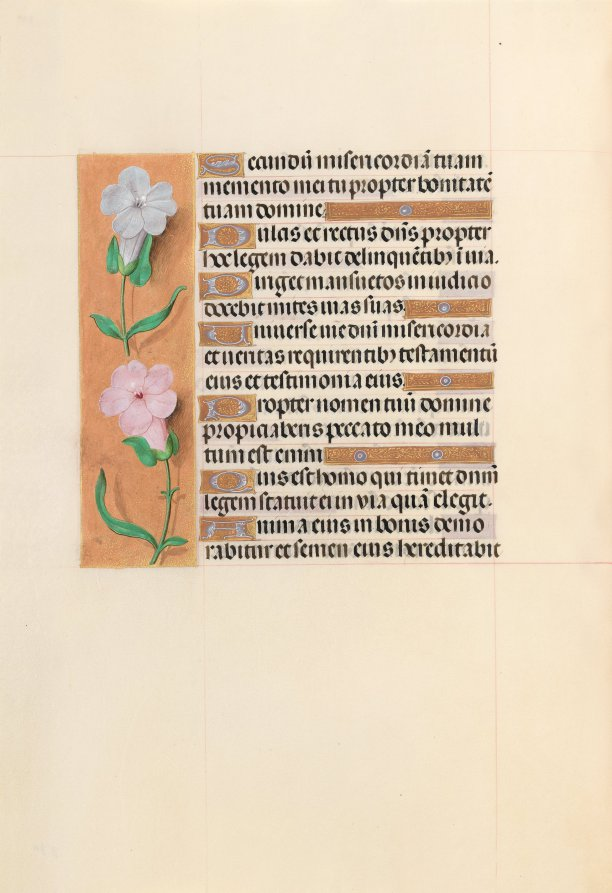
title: Hours of Queen Isabella the Catholic, Queen of Spain: Fol. 234v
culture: Flanders, Ghent and Bruges, late 15th century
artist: Master of the First Prayerbook of Maximillian (Flemish, c. 1444–1519)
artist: and Associates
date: c. 1500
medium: ink, tempera, and gold on vellum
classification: Bound Volume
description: This manuscript was illuminated by a circle of at least five highly organized manuscript painters active in the Flemish cities of Ghent and Bruges. The principal illuminator was Alexander Bening, who painted the majority of the book's miniatures. Manuscripts produced by this circle of artists are renowned for the decoration of their borders, which typically feature a rich variety of realistically-painted flowers, birds, and butterflies. This prayer book, called a book of hours, was intended not for a cleric, but for the private devotions of a lay person-in this case, Isabella the Catholic, Queen of Spain (1451-1504). Isabella's coat of arms embellishes the book's frontispiece. It is unlikely that the book was commissioned by the Queen herself; rather, she probably received it as a diplomatic gift from someone courting her patronage, perhaps Cardinal Francisco Jimenez de Cisneros. A Franciscan friar, Jimenez was dependent upon Isabella for his advancement, first to the post of Queen's confessor in 1492, and then to Archbishop of Toledo in 1495.